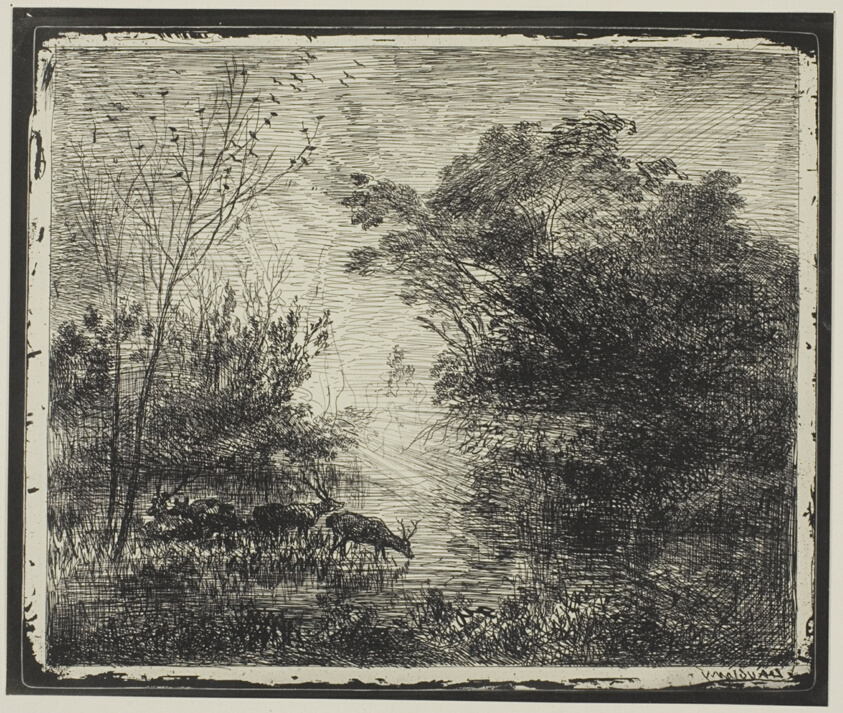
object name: Print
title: Stags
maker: Charles François Daubigny (French, 1817-1878)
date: 1862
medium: Cliché-verre on ivory photographic paper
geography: France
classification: cliché-verre; print; prints and drawing